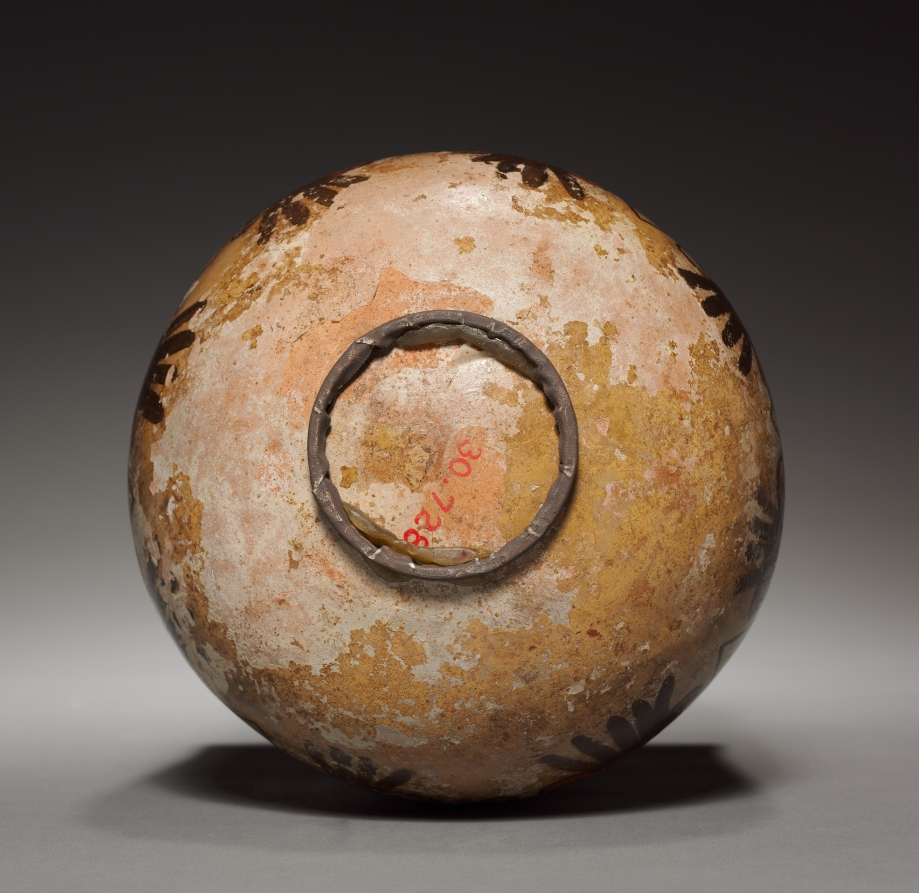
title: Vase with Trophy-heads and Warriors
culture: Peru, South Coast, Nasca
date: c. 450–600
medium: earthenware with colored slips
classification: Ceramic